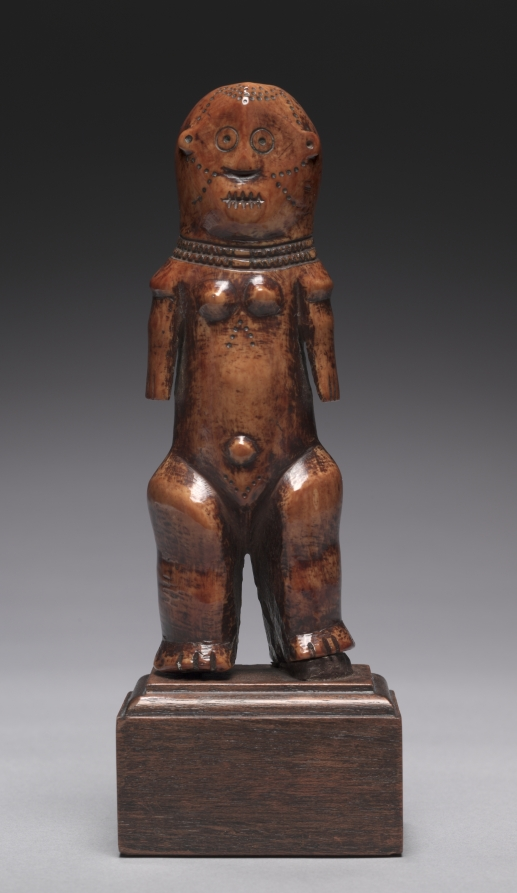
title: Figure (iginga)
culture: Africa, Central Africa, Democratic Republic of Congo, Lega-style maker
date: probably 1800s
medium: Elephant ivory, tukula, and oil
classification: Sculpture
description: The life of Lega men and women is structured around their advancement through the different grades of the Bwami association. Fulfilling political, social, religious, and other roles, the members’ ultimate purpose is the pursuit of wisdom and excellence. Ivory figurines were reserved for members of the two highest Bwami grades, in which the core of the Lega’s moral philosophy is revealed.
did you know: The dark surface (patina) of this sculpture comes from years of handling and the application of oil and a red powder called tukula; it was originally cream-colored!